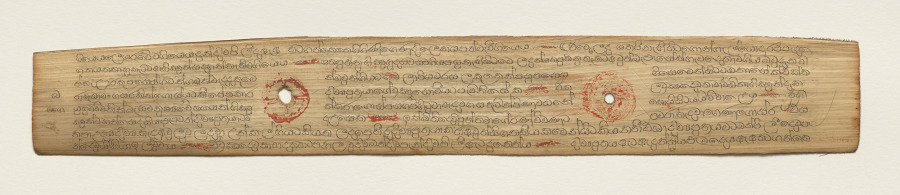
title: Leaf from a Buddhist Manuscript (recto)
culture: Sri Lanka, Singhalese, Late 17th century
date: c. 1700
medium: fiber paper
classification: Manuscript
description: Palm leaf material is still used for manuscripts in Sri Lanka. The palm leaves are prepared first by boiling them, drying them in the sun, and then rubbing them with oils. Scribes then use a metal stylus to incise the text. Then charcoal powder is wiped across the pages, filling in only the inscribed lines.